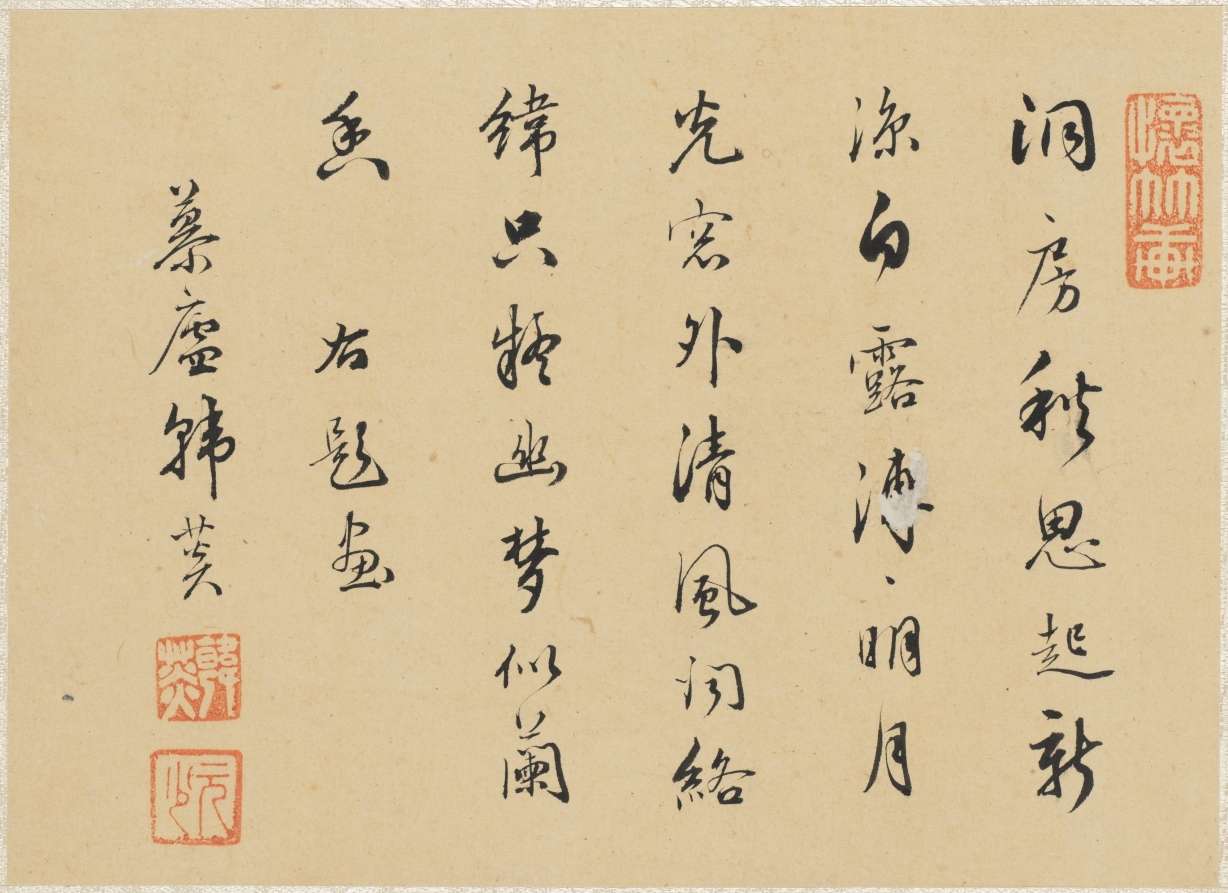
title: Album of Miscellaneous Subjects, Leaf 7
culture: China, Qing dynasty (1644-1911)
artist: Fan Qi (Chinese, 1616–after 1694)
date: early 1650s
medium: album leaf, ink and color on silk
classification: Painting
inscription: Artist seal: Fan Qi 樊圻. Poem by Han Tan 韓菼 (1637–1704): Thoughts of autumn in the nuptial chamber with the new chill arising,/ The white frost all pervasive with a bright moon shining./ Outside the window, a crisp wind conveys the sound of crickets./ Within this quiet dream, I seem to sense the fragrance of orchids.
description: Leaf 7 Han Tan's colophon reads: Thoughts of autumn in the nuptial chamber with the new chill arising, The white frost all persuasive with a bright moon shining. Outside the window, a crisp wind conveys the sound of crickets. Within this quiet dream, I seem to sense the fragrance of orchids.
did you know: The cricket stands on the yellowing leaf of a ripening rice plant.